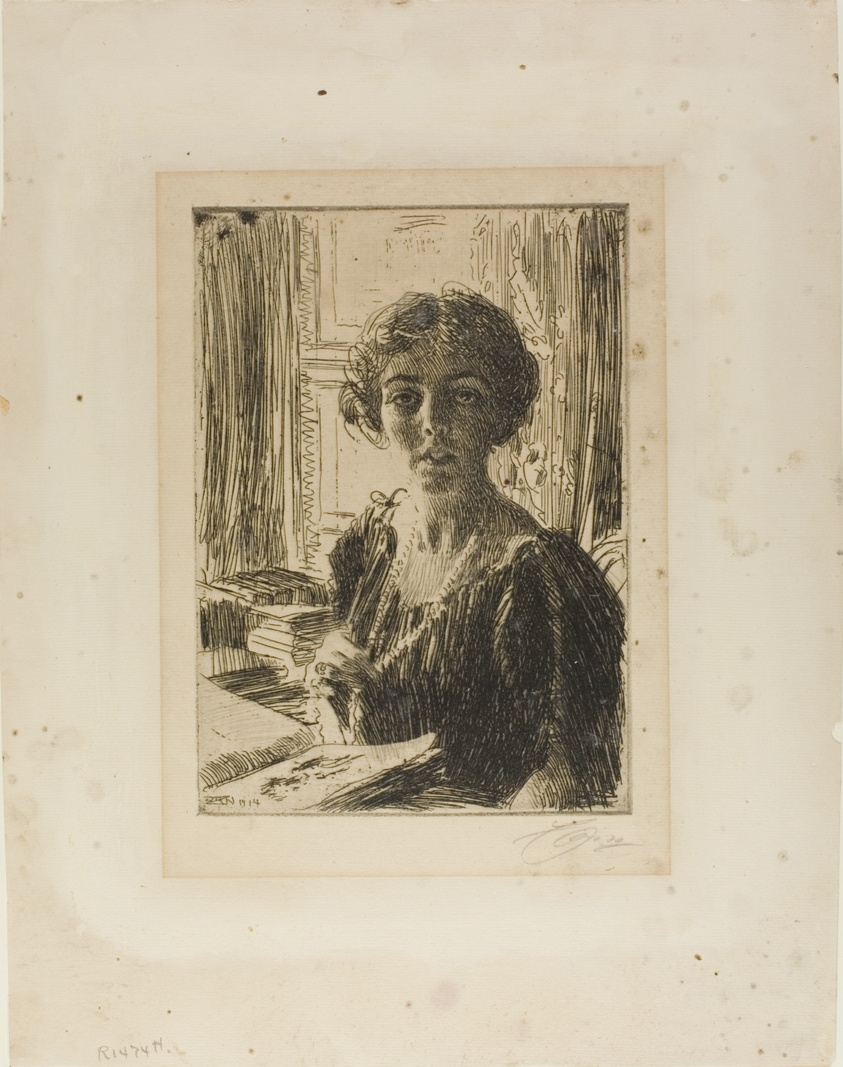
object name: Print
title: The Crown-Princess Margaret of Sweden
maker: Anders Zorn (Swedish, 1860-1920)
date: 1914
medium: Etching on ivory laid paper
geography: Sweden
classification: etching; print; prints and drawing